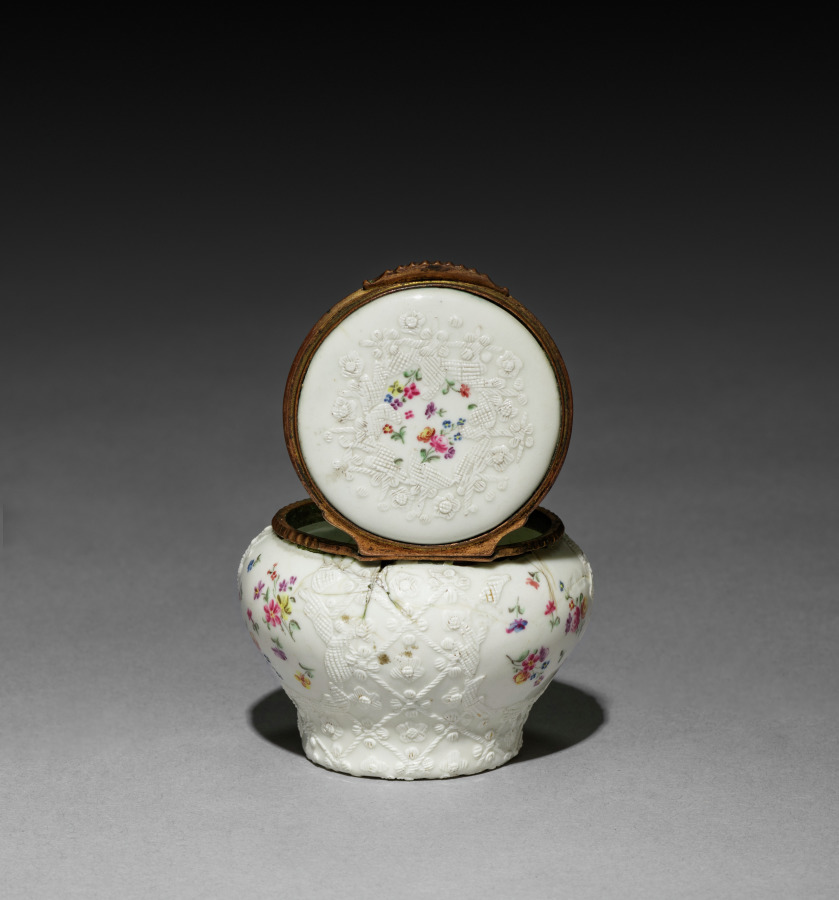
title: Box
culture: England, Staffordshire, 18th century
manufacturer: South Staffordshire Factory (British)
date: c. 1770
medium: enamel on copper with metal mounts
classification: Miscellaneous